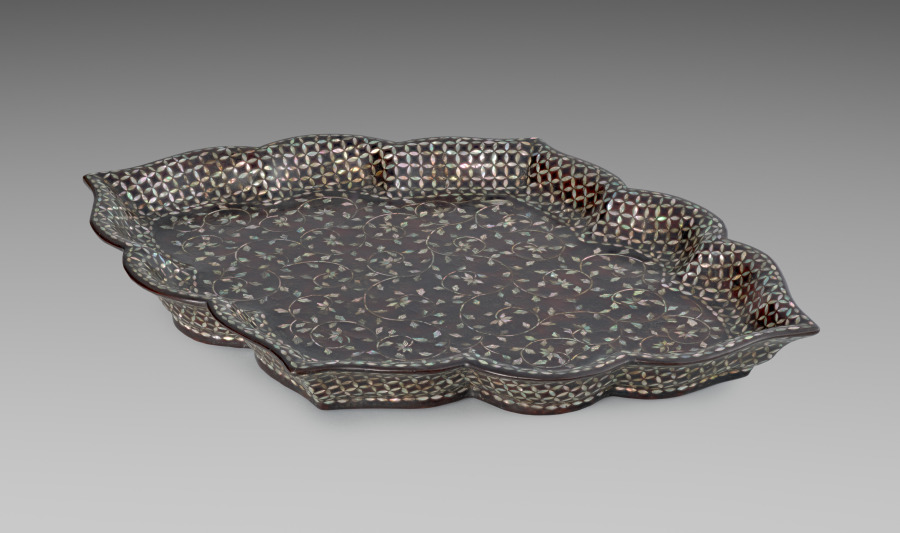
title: Foliate-Shaped Tray with Mother-of-Pearl Inlay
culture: Korea, Joseon dynasty (1392–1910)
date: late 1400s–early 1500s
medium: Inlaid abalone shells on black lacquer ground, applied with red lacquer on the interior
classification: Lacquer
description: Since the Goryeo dynasty, Korean mother-of-pearl lacquerware has been admired for its refinement, though few early examples survive. This tray, datable to the late 1400s or early 1500s, is exceptional for both rarity and condition. Its foliate form, peony vine motif, and intricate lattice border—originally derived from Goryeo-period decorative arts—are exquisitely reinterpreted through the refined craftsmanship of early Joseon artisans.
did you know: This tray’s intricately decorated surface was created through a labor-intensive inlay technique employing thin, precisely cut abalone shell.